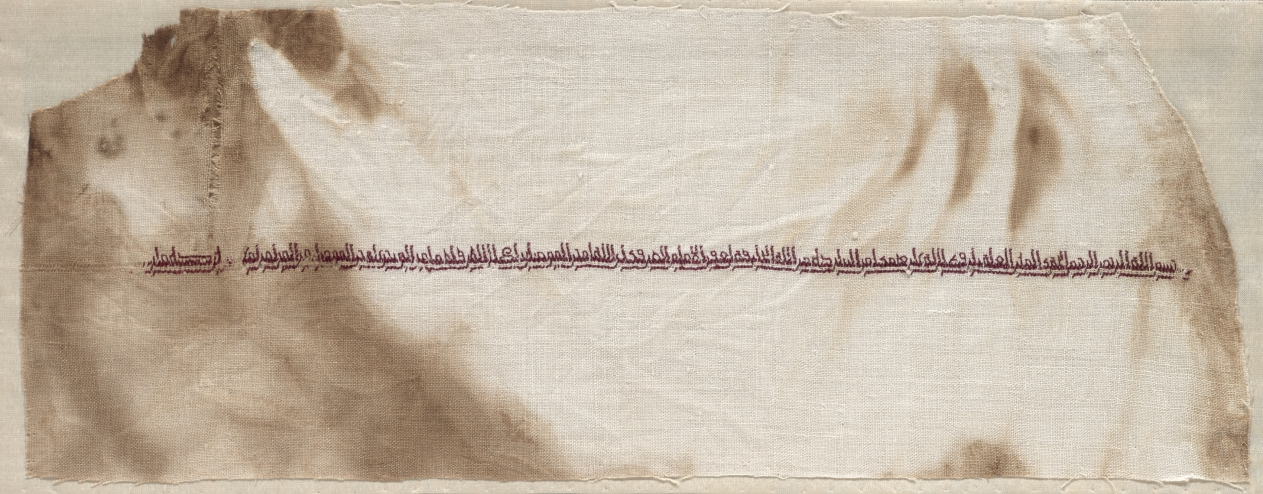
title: Fragment of a Tiraz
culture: Egypt, Abbasid period, during Caliphate of al-Muqtadir, AH 295-320 (A.D. 908-932)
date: 908 – 932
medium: silk embroidery on linen tabby ground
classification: Embroidery